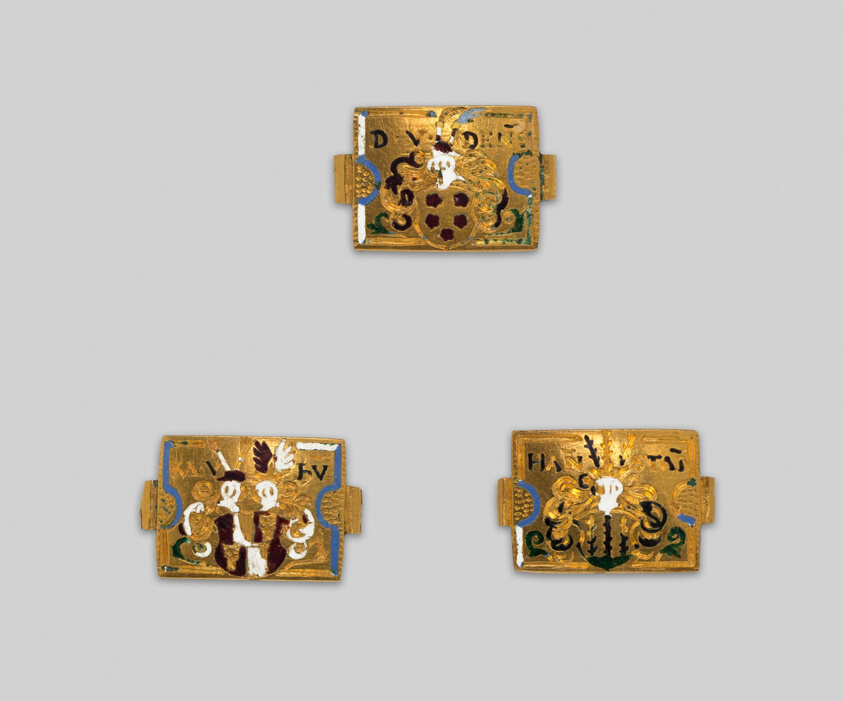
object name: Costume and Accessories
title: Three Fasteners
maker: German; Probably Saxony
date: c. 1650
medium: Gold and enamel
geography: Germany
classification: jewelry; european decorative arts; costume